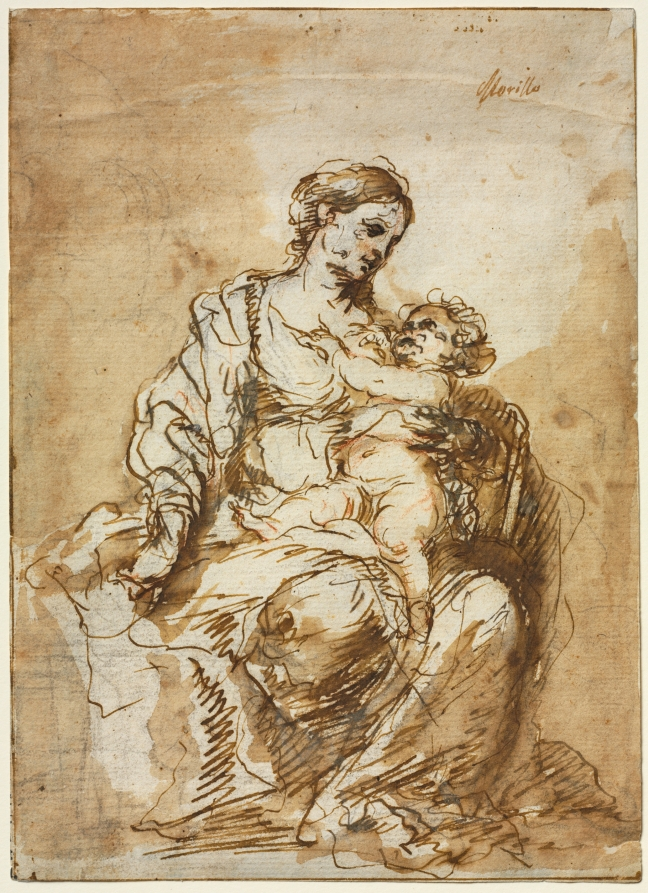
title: Madonna Nursing the Christ Child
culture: Spain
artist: Bartolomé Esteban Murillo (Spanish, 1617–1682)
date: c. 1670–72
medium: pen and brown ink and brush and brown wash over red and black chalk, with traces of white; framing lines in pen and brown ink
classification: Drawing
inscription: in brown ink, upper right: Morillo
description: One of the finest of the rare drawings by Murillo, this sheet is a study for Virgin and Child, commissioned for the family chapel of the Marques de Santiago in Madrid and now at the Metropolitan Museum of Art, New York. Prized today for their dynamism, Murillo’s drawings served the practical purpose of working out the positions of the figures. Here, the artist suggested the tender bond between mother and child with the poignant connection of their gazes. His animated line and zigzag hatching create the feeling of incessant motion while the addition of ink wash creates deep shadows across the forms.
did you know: The inscription Morillo on this drawing is not the artist's signature but rather a notation likely made by a 17th-century owner of the drawing.